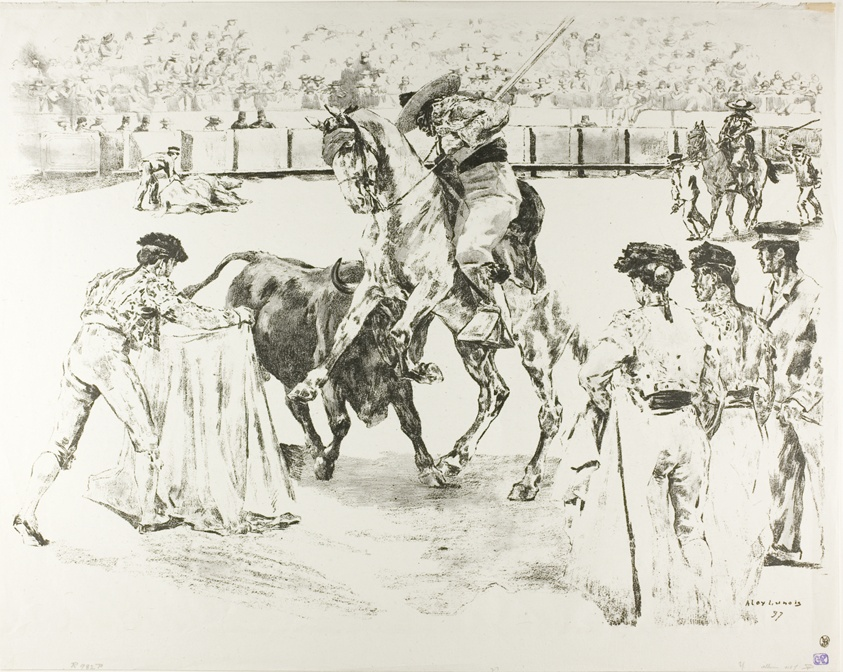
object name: Print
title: Bull-Fight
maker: Alexandre Lunois (French, 1863-1916)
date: 1897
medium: Lithograph in black and gray on grayish-ivory China paper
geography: France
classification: lithograph; print; prints and drawing